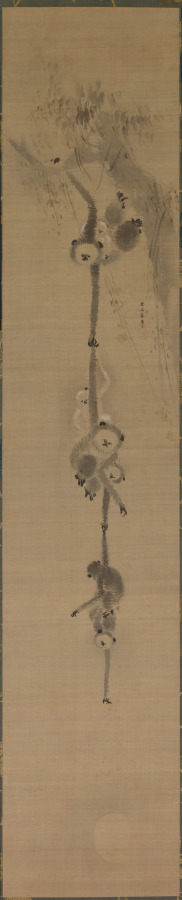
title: Gibbons Reaching for the Moon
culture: Japan, Edo period (1615–1868)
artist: Kano Tan’yū (Japanese, 1602–1674)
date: 1600s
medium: Hanging scroll; ink and light color on silk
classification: Painting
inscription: signed: "Tan'yūsai hitsu"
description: Long-armed gibbons form a chain to reach down from a tree, hoping to touch what they believe is the moon. In fact, the orb remaining beyond their grasp is the full moon’s reflection in the still surface of a pond or lake. The image is a common metaphor for the deluded mind in Buddhist thought. Gibbons do not live in Japan but were known to Japanese painters of the premodern era through paintings brought from China.